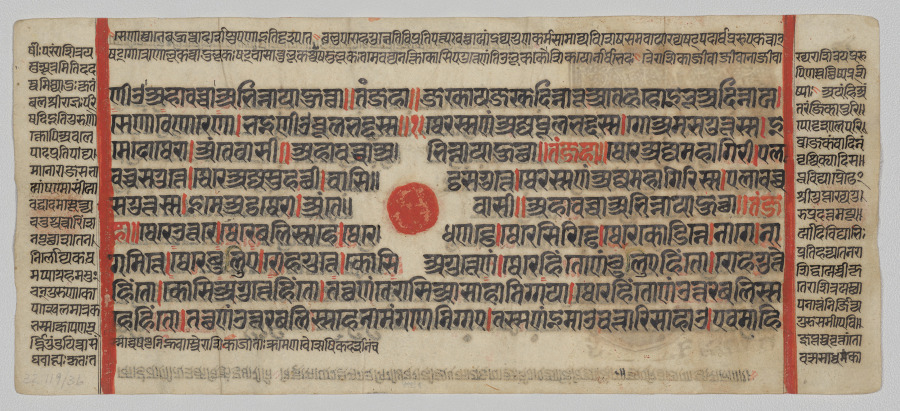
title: Text, folio 61 (recto), from a Kalpa-sutra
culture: Western India, Gujarat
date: c. 1475–1500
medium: Gum tempera, ink, and gold on paper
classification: Painting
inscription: [[recto, beginning with line 1]] ṇīo ahāvaccā abhinnāyā hutthā || taṁ jahā || Jakkhā ya Jakkhadinnā Bhūā taha hoi Bhūadinnā ya | [line 2] *Seṇā *Veṇā Reṇā* | bhaïṇīo Thūlabhaddassa || 1 || therassa ṇaṁ ajja-Thūlabhaddassa | goama-saguttassa | i- [line 3] me do therā | aṁvevāsī [=aṁtevāsī] || ahāvaccā a|bhinnāyā hutthā || taṁ jahā || there ajja-Mahāgirī | elā- [line 4] vacca-sagutte | there ajja-Suhatthī | vāsi||ṭṭha-sagutte | therassa ṇaṁ ajja-Mahāgirissa | elāvacca- [line 5] –saguttassa | ime aṭṭha there | aṁte||vāsī || ahāvaccā abhinnāyā hutthā || taṁ ja- [line 6] hā || there Uttare | there Balissahe | there | Dhaṇaḍḍhe | there Siriḍḍhe | there Koḍinne | Nāge | Nā- [line 7] gamitte | *there *Chulie* | Rohagutte | kosia-gutte ṇaṁ | therehiṁto ṇaṁ Chuliehiṁto | Rohagutte- [line 8] hiṁto | *kosia*-gutte*hiṁto | *tattha ṇaṁ *Terāsiā sāhā* niggayā* | therehiṁto ṇaṁ Uttara-Balissa- [line 9] hehiṁto | tattha ṇaṁ Uttara-Balissahe nāmaṁ gaṇe niggae | tassa ṇaṁ imāo cattāri sāhāo | evam=āhi-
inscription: [[verso, beginning with line 1]] jjaṁti || taṁ jahā | kosiṁbiā | suvattittiā | ma *koḍuṁbāṇī* | caṁdanāgarī | therassa ṇaṁ ajja-Suhatthissa | [line 2] vāsiṭṭha-saguttassa | ime duvālasa therā | aṁtevāsī || ahāvaccā abhinnāyā hutthā || taṁ jahā | there a| [line 3] jja-Rohaṇe 1 Bhaddajase 2 | Mehe gaṇī a 3 | Kāmiḍḍhī 4 | Suṭṭhia 5 | Suppaḍibuḍḍha 6 Rakkhia 7 | ta- [line 4] ha Rohagutte a | 8 || 1 | Isigutte 9 || Sirigutte 10 gaṇī a Baṁbhe 11 gaṇī a taha Some 12 [line 5] dasa do a gaṇaharā khalu | ee sīsā Suhatthissa || 2 | therehiṁto ṇaṁ ajja-Rohaṇe- [line 6] hiṁto | kāsava-guttehiṁto | tattha ṇaṁ uddehagaṇe nāmaṁ gaṇe niggae | tass’imāo cattāri sāhā- [line 7] o niggayāo | cha=cca kulāiṁ | evaṁ āhijjaṁti | se kiṁ taṁ sāhāo sāhāo | evam=āhijjaṁti || taṁ jahā || [line 8] uḍuṁbarijjiā | māsapūriā | maïpattiā | punnaputtiā | se taṁ sāhāo | se kiṁ taṁ kulāiṁ | evam=ā| [line 9] hijjaṁti || taṁ jahā || paḍhamaṁ ca nāgabhūaṁ | bīaṁ puṇa somabhūiaṁ hoi | aha ullagaccha taïaṁ | caüttha-